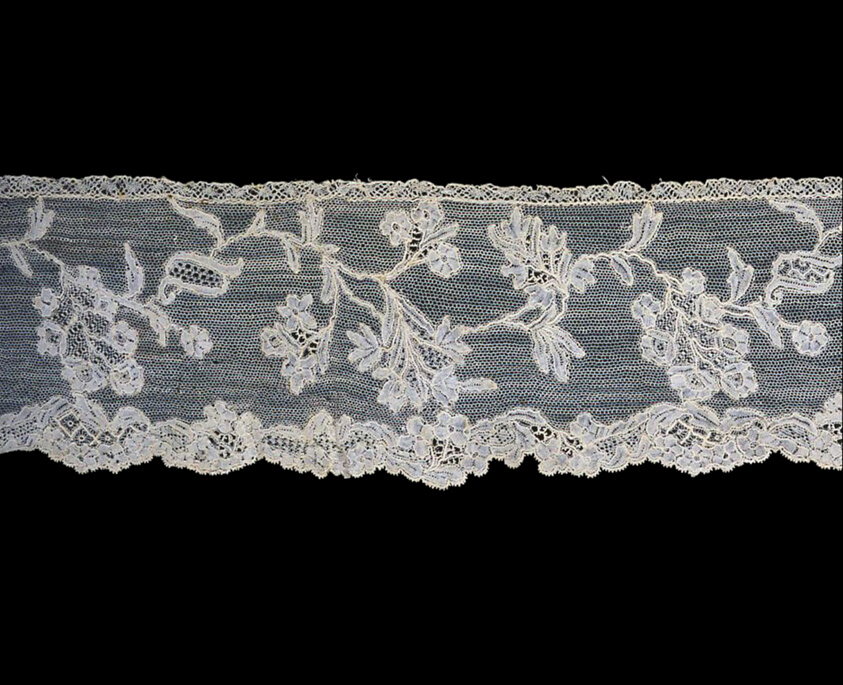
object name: Textile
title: Border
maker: Italy, Venice or Burano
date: 1770s/80s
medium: Linen, needle lace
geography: Italy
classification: textile; lace - needle